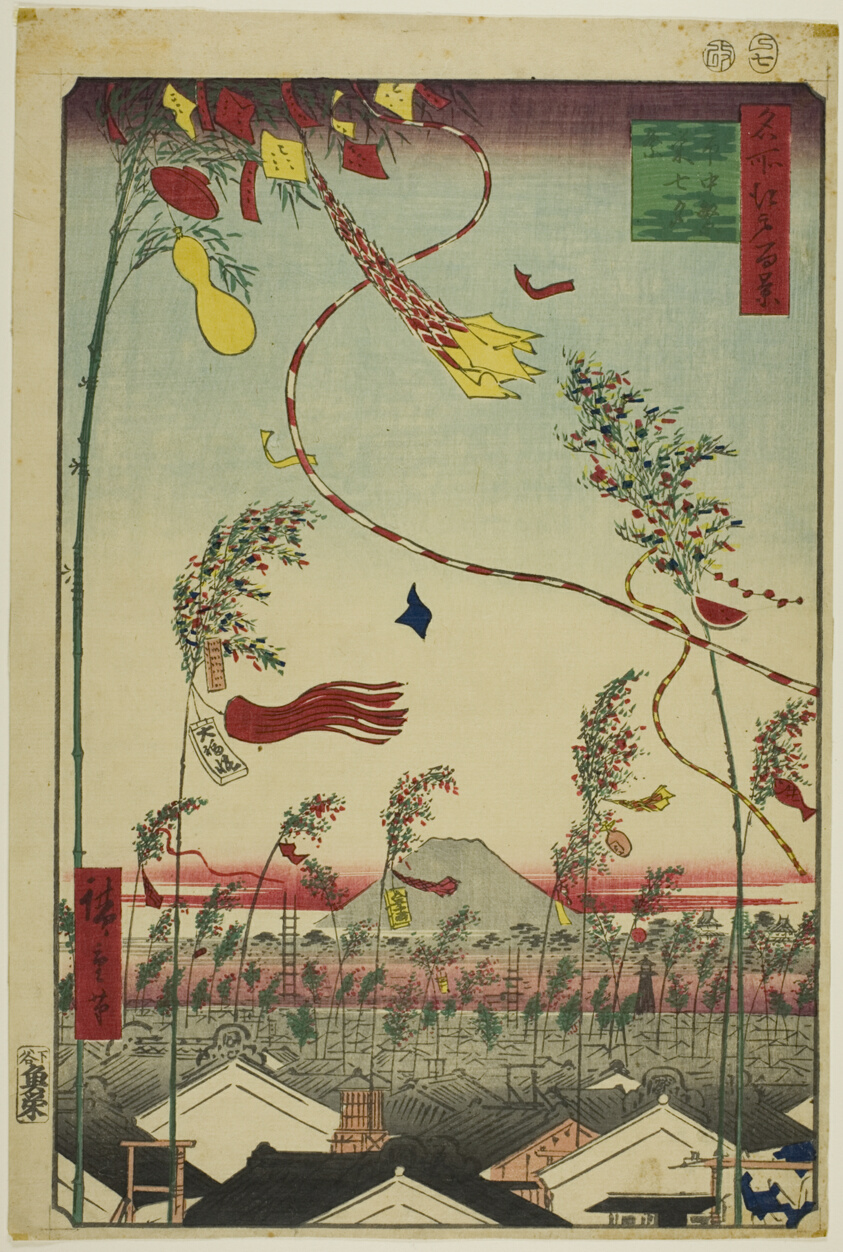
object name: Print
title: The City Flourishing, Tanabata Festival (Shichu han'ei Tanabata Matsuri), from the series “One Hundred Famous Views of Edo (Meisho Edo hyakkei)”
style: Japanese (culture or style)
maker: Utagawa Hiroshige 歌川 広重; Japanese, 1797–1858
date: 1857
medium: Color woodblock print; oban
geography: Japan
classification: woodblock print; print